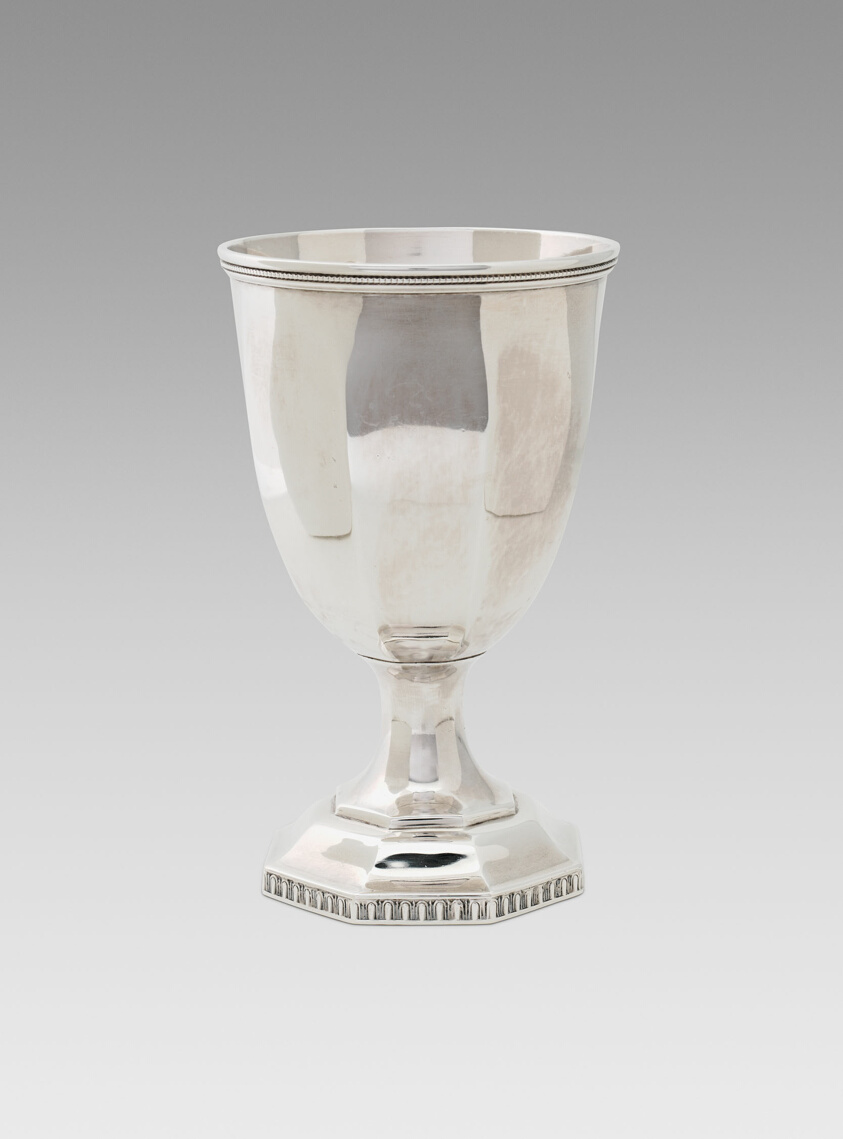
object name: Metalwork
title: Goblet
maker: William Gale & Son (American, 1850–58; 1862–66); New York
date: 1852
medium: Silver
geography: New York City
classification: drinking vessel; silver; american decorative arts; american arts; decorative arts